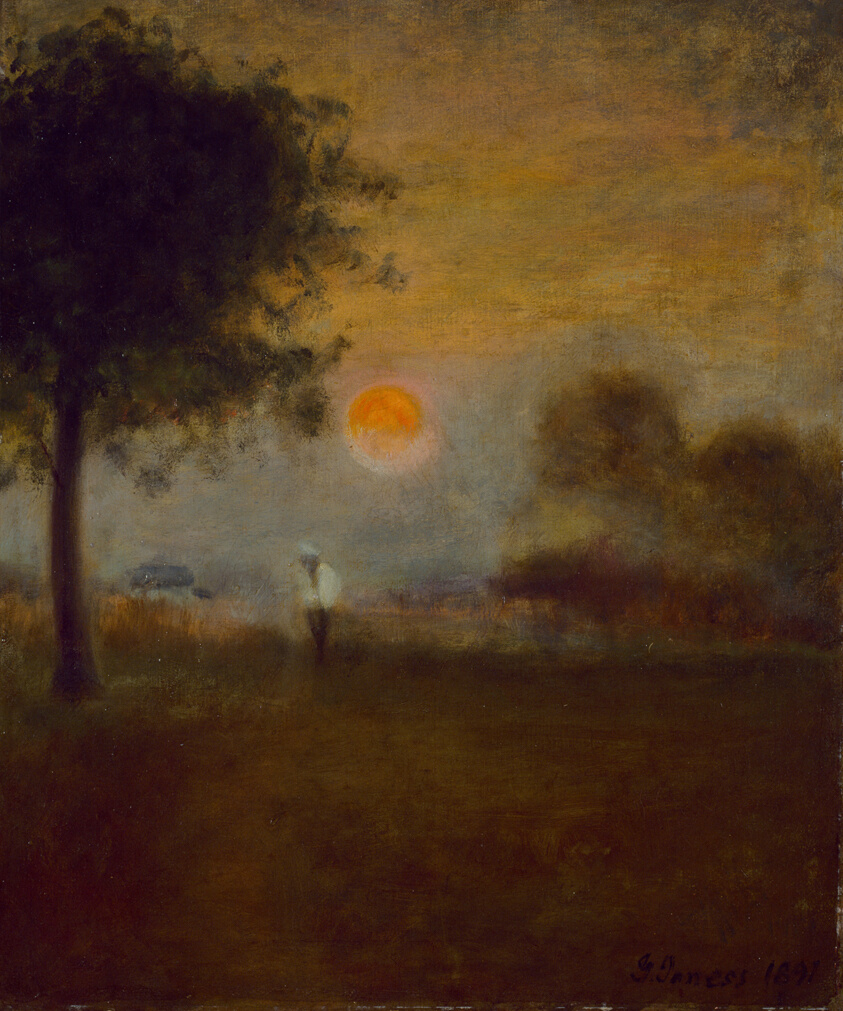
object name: Painting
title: Moonrise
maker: George Inness (American, 1825–1894)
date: 1891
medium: Oil on canvas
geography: United States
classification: painting; american arts